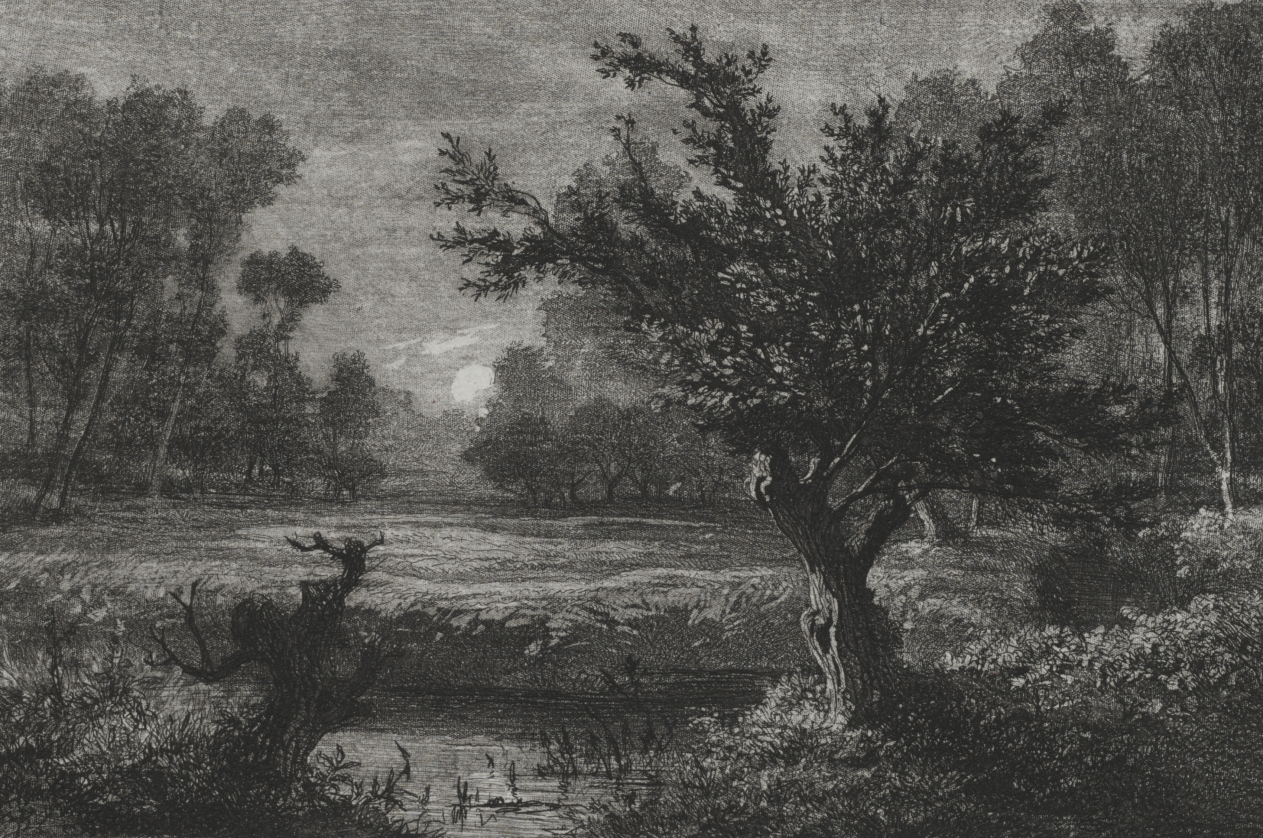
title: Moonrise in the Andilly Valley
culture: France, 19th century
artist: Charles François Daubigny (French, 1817–1878)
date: 1845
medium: etching, drypoint and roulette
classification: Print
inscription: signed, lower left, in plate: C. Daubigny ivn. [sic]